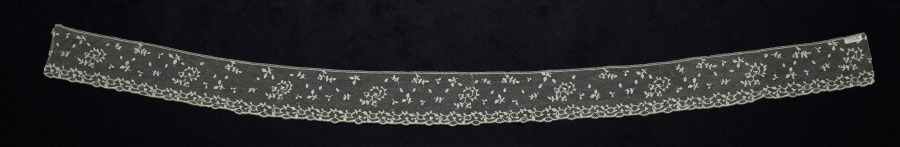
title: Lace Edging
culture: Belgium, Brussels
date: late 1800s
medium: Bobbin lace with appliquéd net ground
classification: Lace